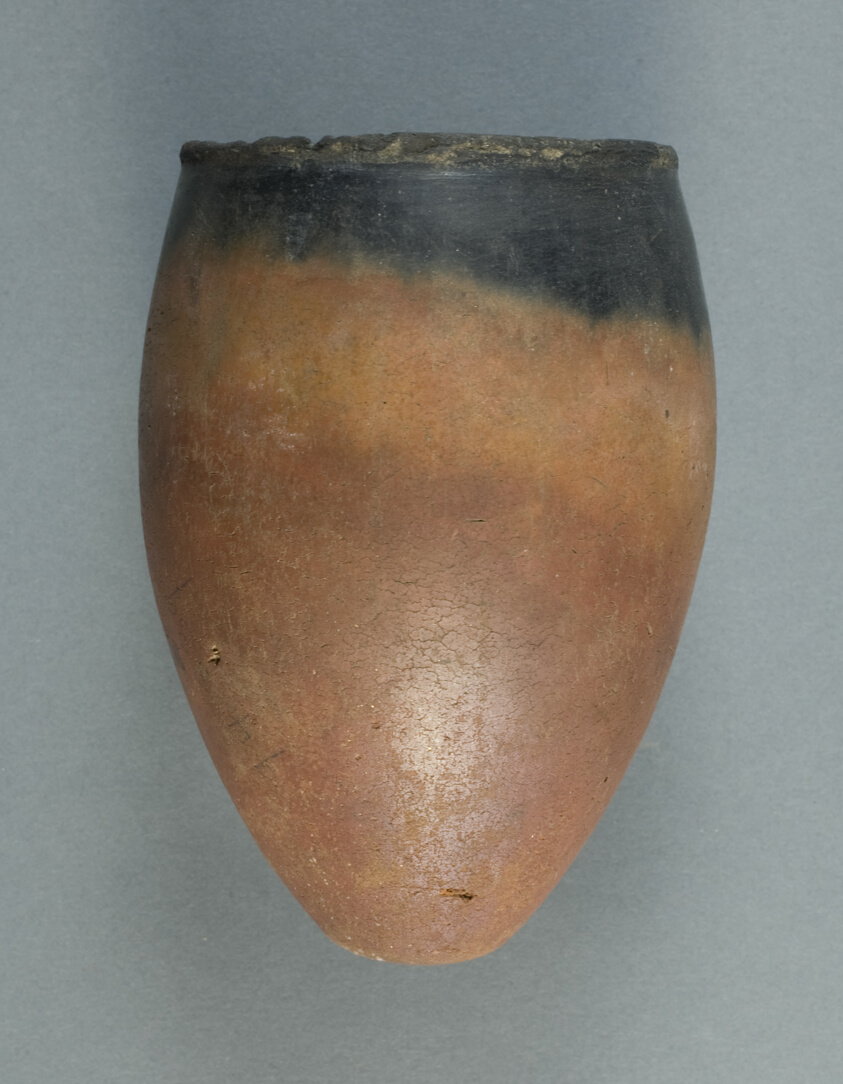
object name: Vessel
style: egyptian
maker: Egyptian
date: Predynastic Period, Naqada I–II (about 4000–3200 BCE)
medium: Ceramic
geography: Egypt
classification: vessel; ceramics; ancient art